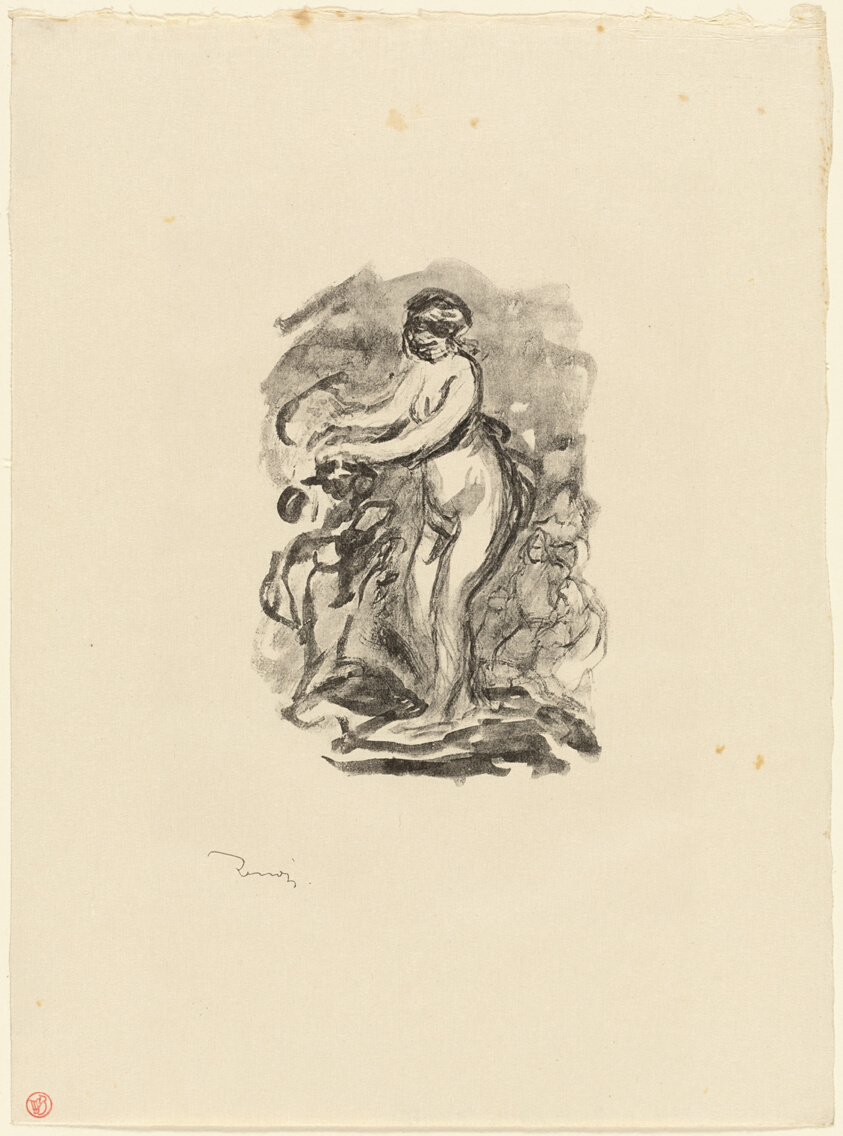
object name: Print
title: Woman with Grapevine, 1st variant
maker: Pierre Auguste Renoir (French, 1841-1919); printed by Auguste Clot (French, 1858-1936); published by Ambroise Vollard (French, 1835-1939)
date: c. 1904; published 1919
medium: Lithograph in black on cream Japanese paper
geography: France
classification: lithograph; print; prints and drawing